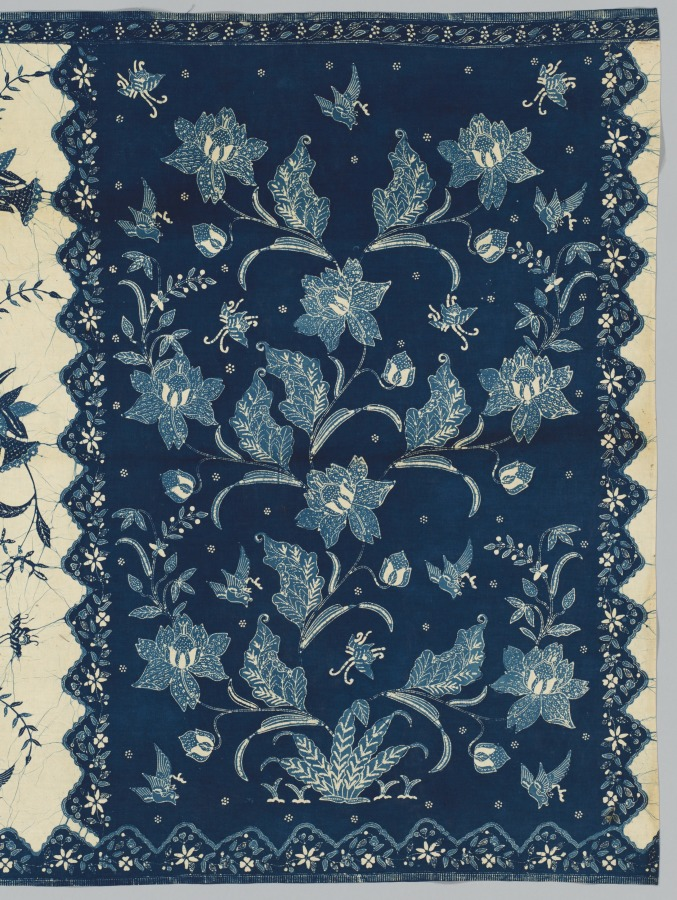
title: Sarong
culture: Indonesia, Java, North Coast, mid-19th century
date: mid-1800s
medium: Cotton: plain weave, wax-resist dyed (batik)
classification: Textile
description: Batiks made in the North Coast region of Java, specifically in Pekalongan, were influenced by both Indian and European motifs due to the Dutch presence in Indonesia. In this sarong we see a mixture of Indian and European flowers including jasmine, lilac, and daffodil. Batik is a wax-resist dyeing technique used throughout Java. Hot wax is applied with a tool known as a canting and a design is hand drawn with incredible skill. This sarong was then dyed with indigo, a well sought after and culturally important natural dye. Areas on the fabric with wax will not accept the indigo dye, hence the term wax-resist.